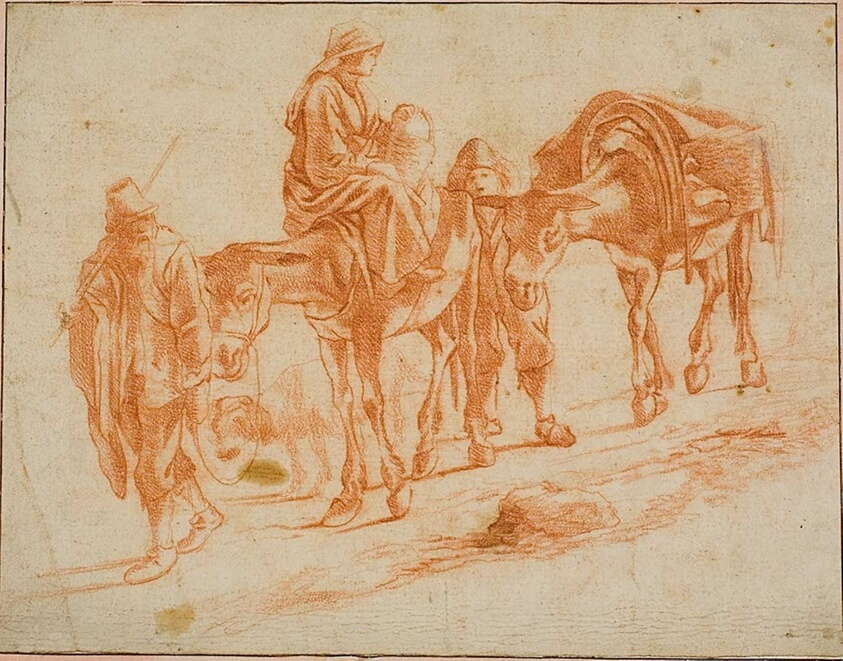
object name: Drawing and Watercolor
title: Travelers with Two Mules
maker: Jan Miel (Flemish, 1599-1663); or Jan Both (Dutch, c. 1618-1652)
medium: Red chalk on ivory laid paper, laid down on ivory laid card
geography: Netherlands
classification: chalk; drawings (visual works); prints and drawing